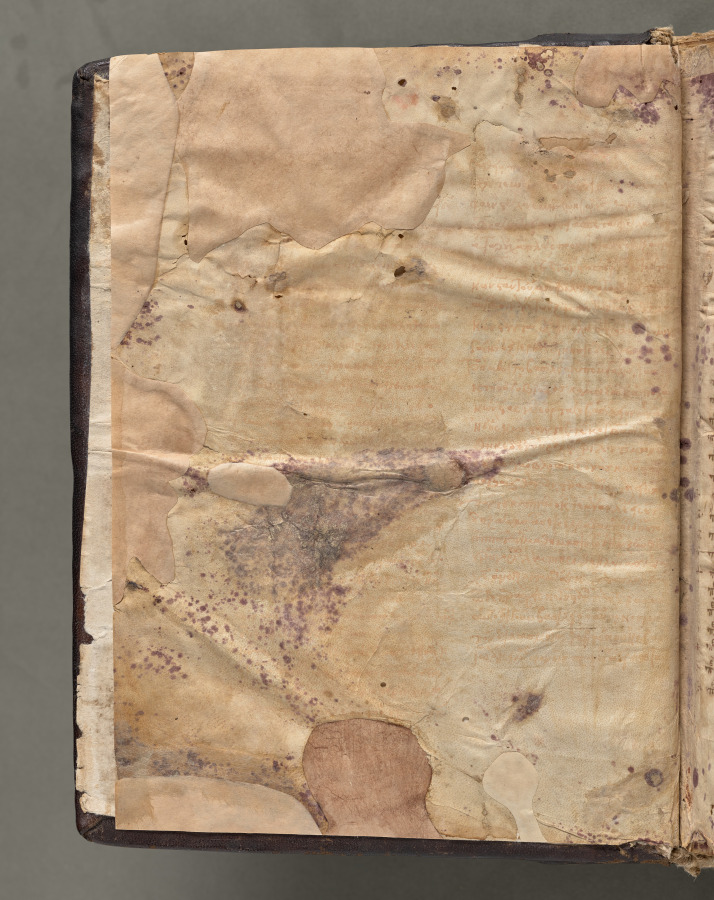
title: Text, folio 2 (verso), from a Gospel Book with Commentaries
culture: Byzantium, Constantinople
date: c. 1000–1100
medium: ink, tempera, and gold on vellum; leather binding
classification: Bound Volume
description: Each of the four gospels in this book opens on a page with brilliantly illuminated borders depicting the author of the text as well as birds-principally peacocks, symbols of the immortality of the soul-and fountains, representing the fountain of life and the salvation of the soul. This volume consists of 428 leaves with texts in Greek. Its level of sophistication suggests that it was probably written and decorated in a monastery in Constantinople.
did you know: Gospel Books were carried in procession through Byzantine churches.